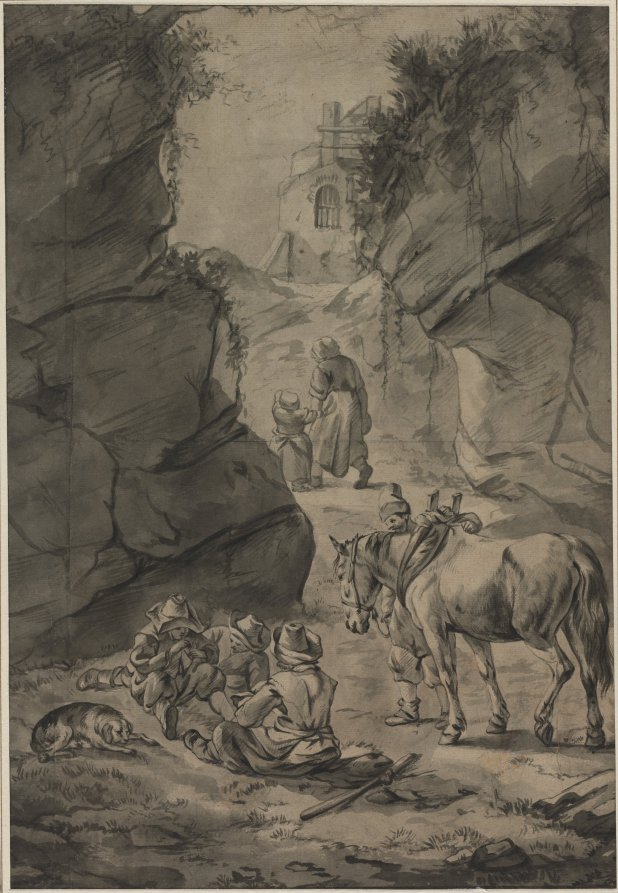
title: Peasants in a Rocky Landscape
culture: Netherlands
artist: Jan Wouwerman (Dutch, 1629–1666)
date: 1629–66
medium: brush and black ink, brush and gray wash, and black chalk; framing lines in black ink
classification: Drawing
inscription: VERSO (OR RECTO OF SECONDARY SUPPORT, visible through transmitted light): [various characters, penmanship exercises?] ; VERSO OF SECONDARY SUPPORT, center, in graphite: 94 [circled] ; lower center, in graphite: 2 a